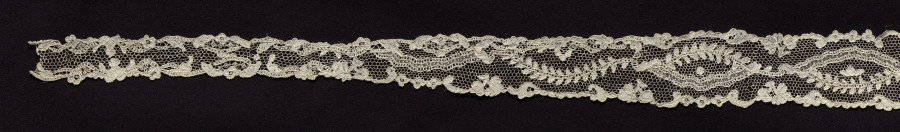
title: Lace Lappet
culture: France, Argentan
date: 1715–74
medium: Linen: needle lace (Point de Argentan)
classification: Lace